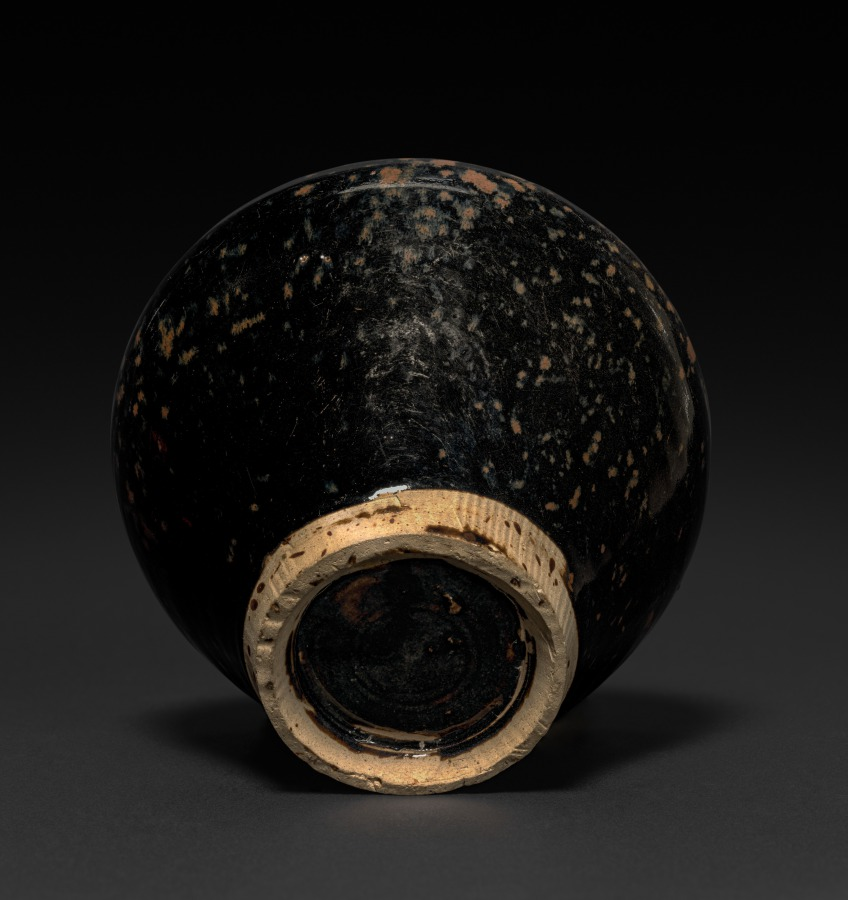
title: Vase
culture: China, Northern Song dynasty (960-1127)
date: 1000s–1100s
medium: glazed stoneware with underglaze iron decoration, Northern Black ware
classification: Ceramic